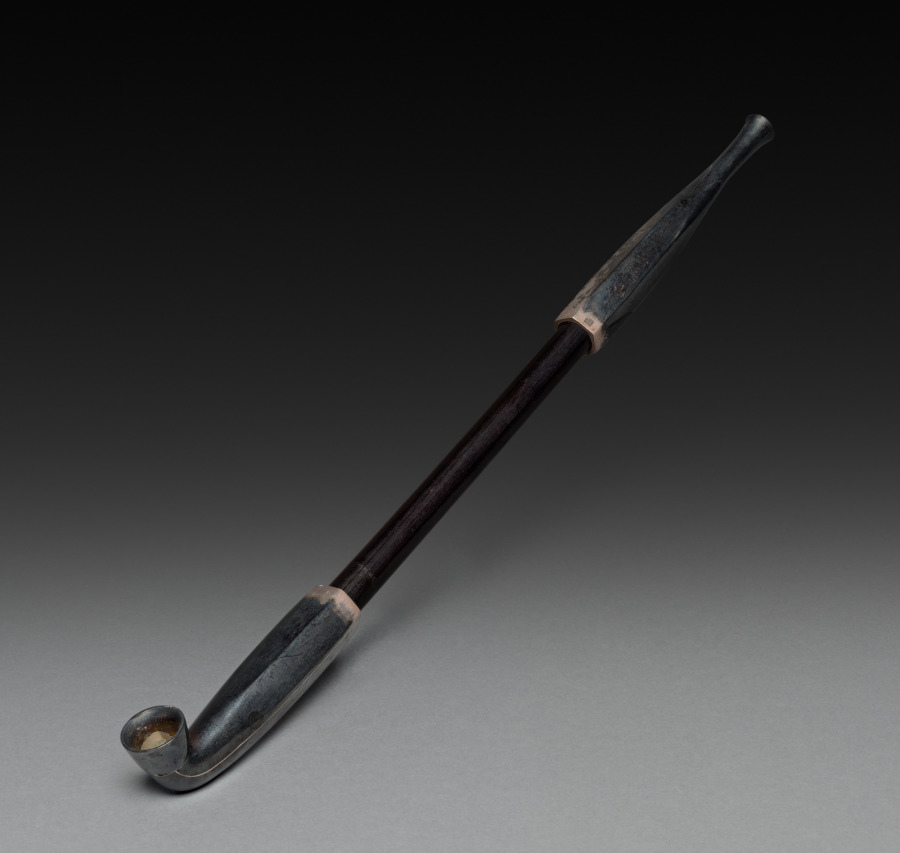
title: Tobacco Pipe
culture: Japan, Edo period (1615–1868)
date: 1700s to mid-1800s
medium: wood and silver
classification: Miscellaneous